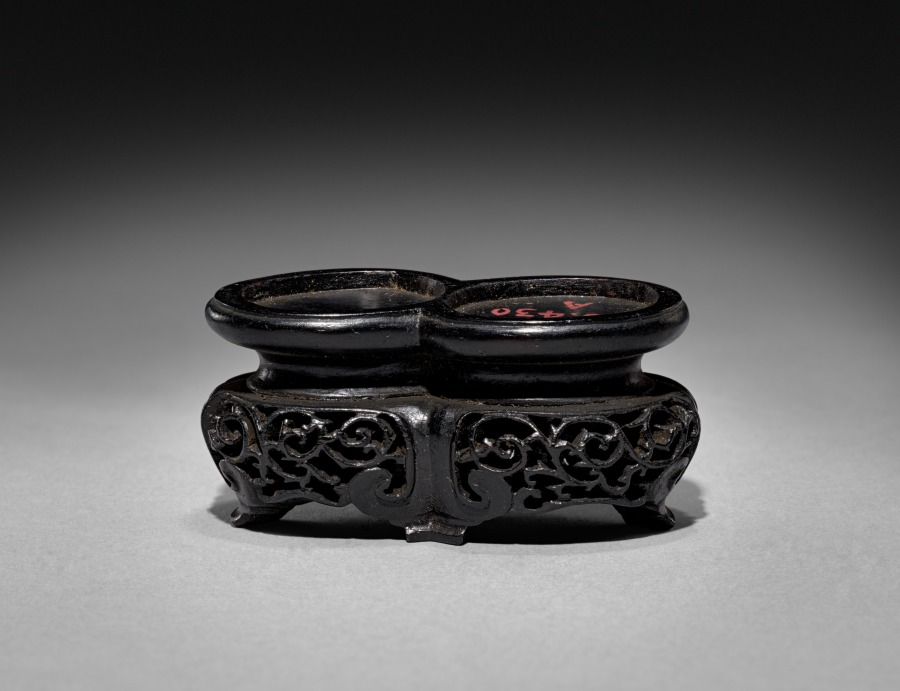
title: Snuff Bottle - Double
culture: China, Qing dynasty (1644-1911)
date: 1644–1911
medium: glass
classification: Glass